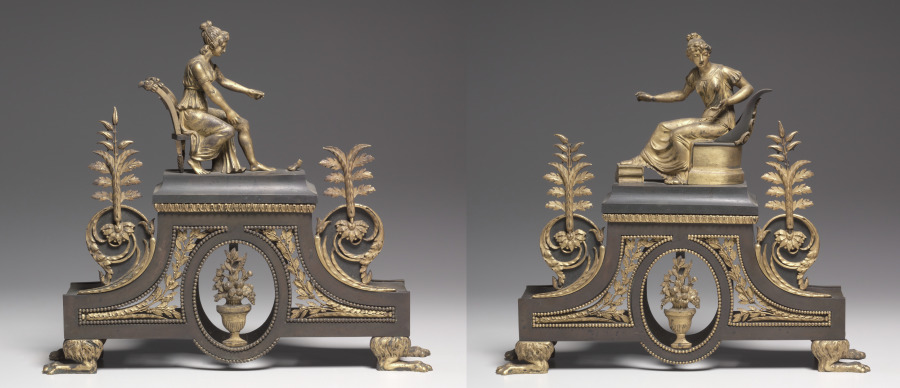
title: Pair of firedogs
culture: France, 18th century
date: c. 1790–1800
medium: bronze and gilded bronze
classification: Furniture and woodwork